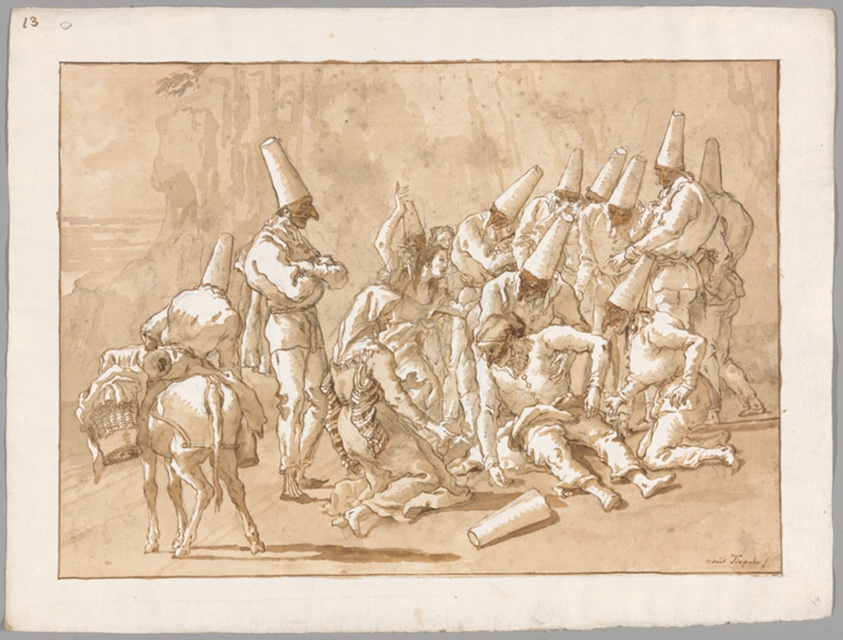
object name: Drawing and Watercolor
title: Punchinello Collapses on the Road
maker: Giovanni Domenico Tiepolo (Italian, 1727–1804)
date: c. 1791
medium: Pen and brown ink and brush and brown washes, over traces of charcoal, on off-white laid paper, with framing lines in pen and brown ink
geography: Italy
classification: drawings (visual works); paper; brush and wash; pen and ink drawings; prints and drawing